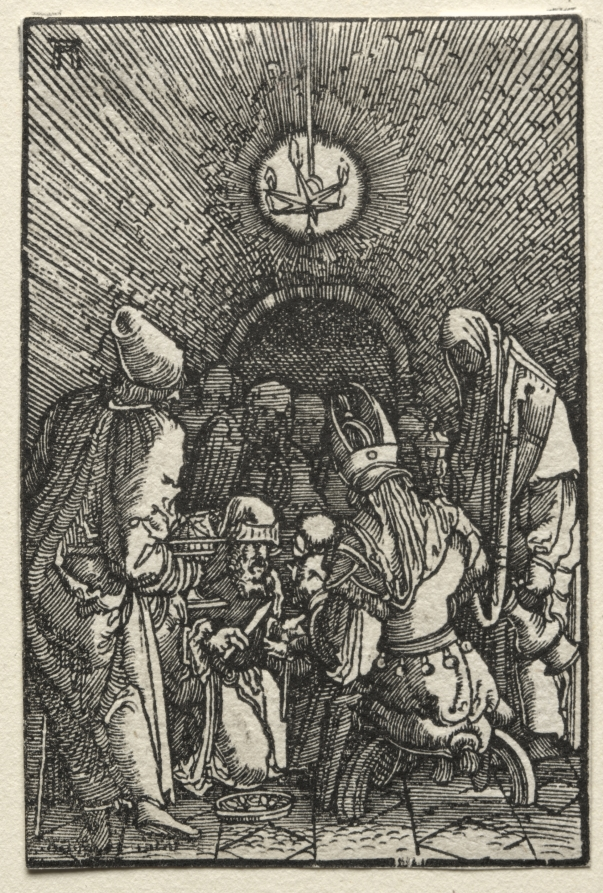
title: The Fall and Redemption of Man: The Circumcision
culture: Germany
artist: Albrecht Altdorfer (German, c. 1480–1538)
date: c. 1515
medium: woodcut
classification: Print